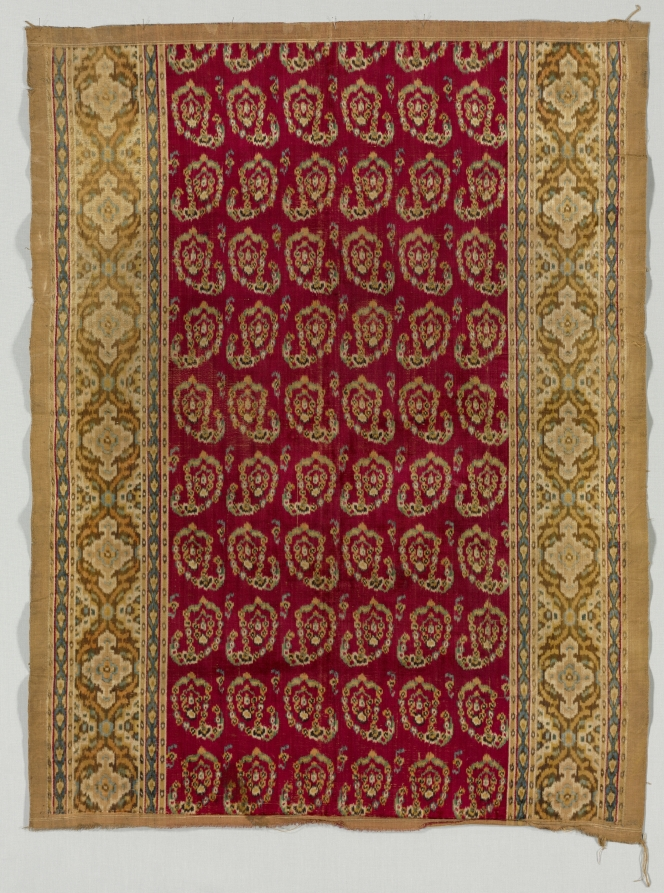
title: Velvet Panel "Kashan Velvet"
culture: Iran, 19th century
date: 1800s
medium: velvet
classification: Velvet